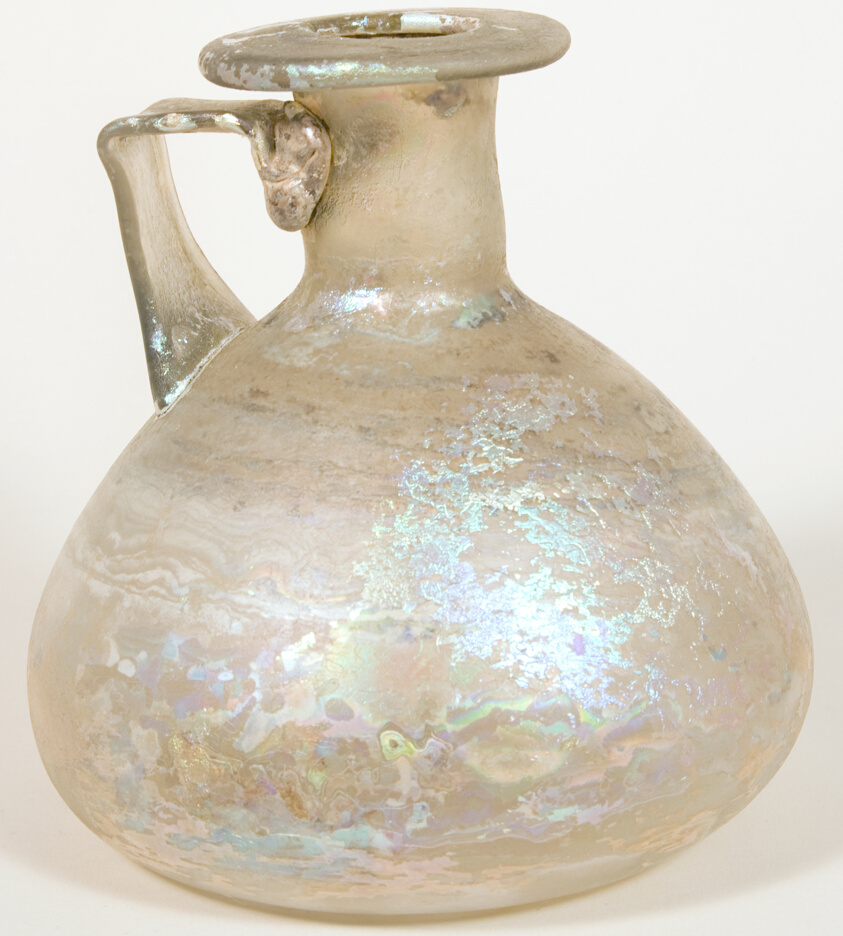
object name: Vessel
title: Jug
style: roman (ancient, style or period), ancient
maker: Roman; Eastern Mediterranean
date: 1st-3rd century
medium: Glass, blown technique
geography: Eastern Mediterranean Region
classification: vessel; glass; ancient art